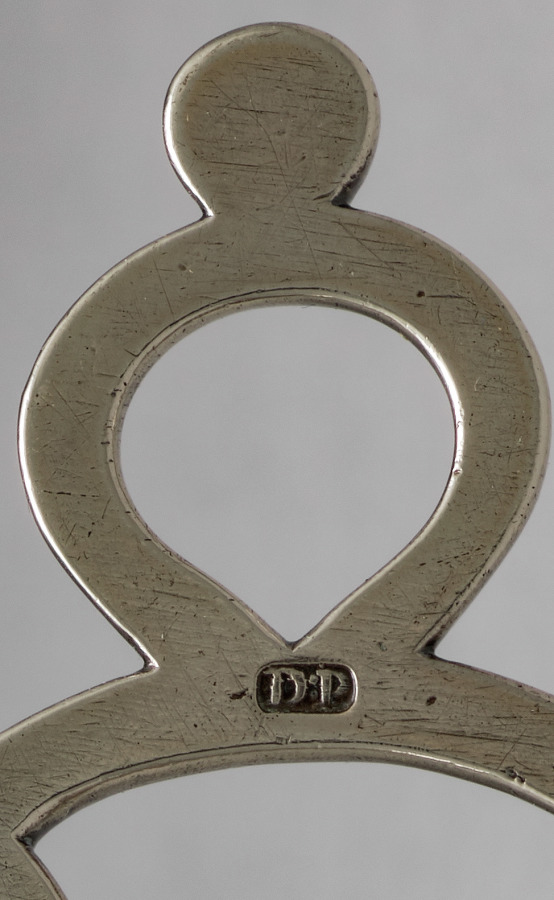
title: Strainer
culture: America, Massachusetts, Boston and Salem, 18th century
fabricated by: Daniel Parker (American, 1726–1785)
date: c. 1765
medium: silver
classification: Silver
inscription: engraved "H" over "B + H" in shaded block letters on side of bowl.